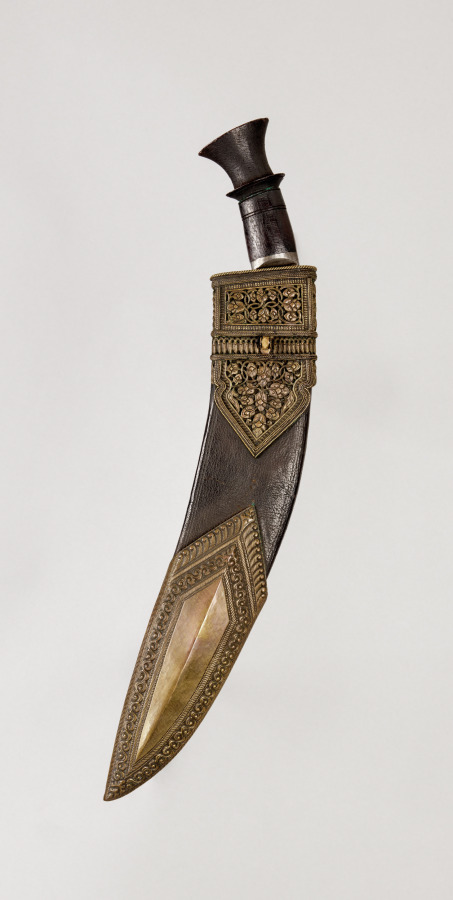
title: Knife (Kukri)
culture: Nepal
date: c. 1750–1800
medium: steel with etched surface and wooden handle, leather covered scabbard with brass mounts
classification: Arms and Armor